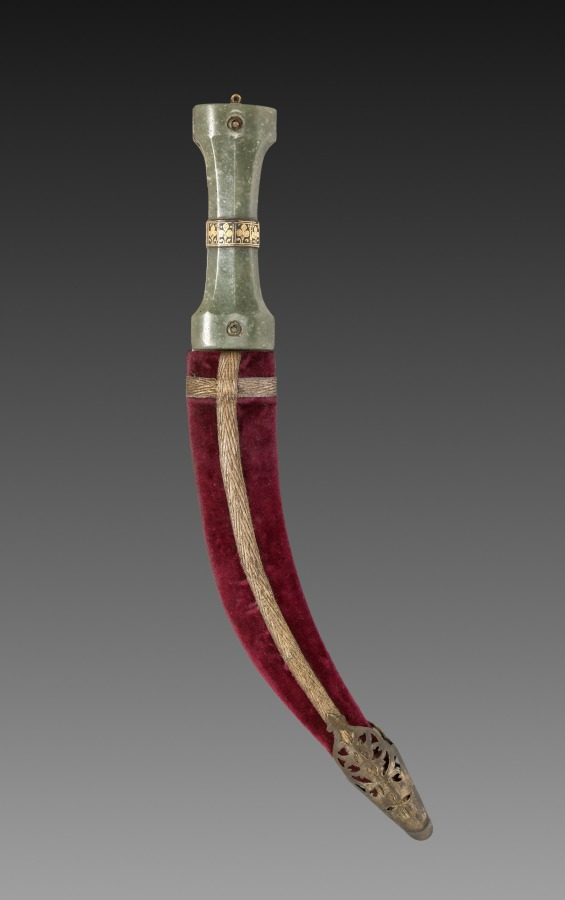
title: Khanjar dagger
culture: India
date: c. 1600s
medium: Jade hilt with iron and gold; steel blade with iron and gold; wood sheath covered in velvet with metallic thread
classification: Arms and Armor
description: Daggers with curved blades, known as khanjar, were worn tucked into the belt as one of the basic accessories for Mughal men. An all-purpose knife that could be used in hunting or fighting, the khanjar was also a visible status symbol. The use of jade and gold indicates that this dagger was owned by a member of the court. The gold inscriptions on the blade, just under the hilt, are quotations from the Qur’an, the most sacred book for Muslims. On one side is the opening line: “In the Name of God the Merciful and the Compassionate,” and on the other is a popular verse from chapter (sura) 61: “Help comes from God, and Victory is imminent.”